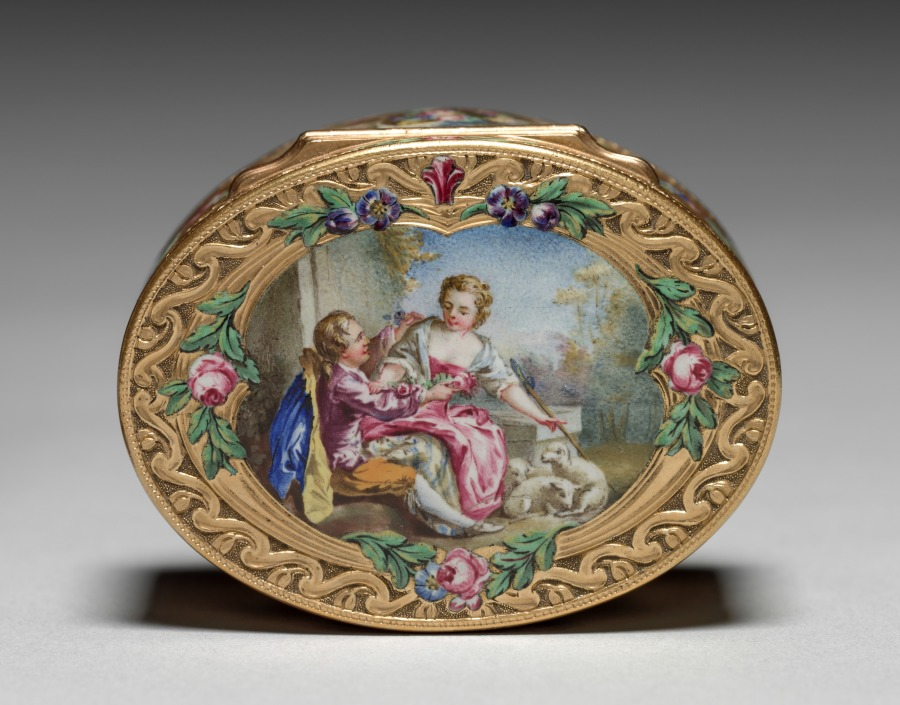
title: Snuff Box (Tabatière)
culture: France, 18th century (style of Louis XV)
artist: Francois Guillaume Tiron (French)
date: 1761–62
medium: gold and enamel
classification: Miscellaneous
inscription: [Maker's mark of Francois-Guillaume Tiron, master goldsmith in 1747, inside cover]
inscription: [Warden's mark, Paris, 1761-1762, inside cover]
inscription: [Charge mark of Eloi Brichard and Etienne Somfoye, Paris, 1756-1762, inside cover]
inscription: [Maker's mark of Francois-Guillaume Tiron, inside bottom]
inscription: [Warden's mark, 1761-1762, inside bottom]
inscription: [Charge mark of Brichard and Somfoye, inside bottom]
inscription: [Maker's mark of FG Tiron, left wall]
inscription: [Charge mark of Brichard and Somfoye, left wall]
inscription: [Warden's mark, Paris, 1761-1762, left wall]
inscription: [Discharge mark of J.J. Prevost, Paris, 1762-1768, bezel at right]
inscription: [Engraved number, maybe retailer's number]: "n. 13676"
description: The pastoral scenes that decorate this box are typical of the style of François Boucher, a celebrated painter of the period whose works were popularly reproduced on decorative arts. Snuff boxes, used practically as containers for powdered tobacco, were often decorated with miniature reproductions of notable works. The miniature on the cover is inspired by Boucher’s The Galant Pastor (Le Pasteur Gallant) (1738) and that on the bottom by The Amusement of the Shepherd Girl (L’Amusement de la Bergère) (1700s).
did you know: François Boucher was a favorite of the French royal court of Louis XV and named first painter of the king in 1765.